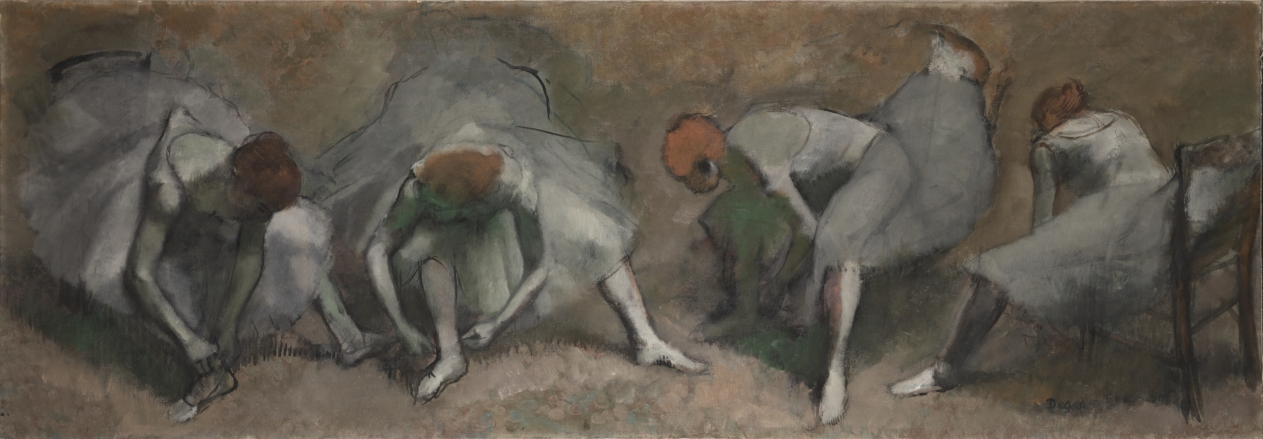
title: Frieze of Dancers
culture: France, 19th century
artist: Edgar Degas (French, 1834–1917)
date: c. 1895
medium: oil on fabric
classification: Painting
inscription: Signed in lower right: Degas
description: This painting may depict a single dancer seen from four different viewpoints. The young woman is placed in an undefined setting, surrounded by mere wisps of color, applied so spontaneously that the paint ran and dripped. Degas even added the circles in the foreground with his thumb. Such audacity, while acceptable in a small sketch, must have shocked the artist's contemporaries when presented on a six-foot canvas. Equally radical is the idea of combining multiple views of a single figure. Degas's unusual presentation may have been inspired by the photographs of Eadweard Muybridge (1830-1904)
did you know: The ballet is a subject Degas returned to again and again over the course of his career. Rather than public performances, he often depicted dancers behind the curtain, practicing, waiting, or, as in this painting, lacing up their shoes.